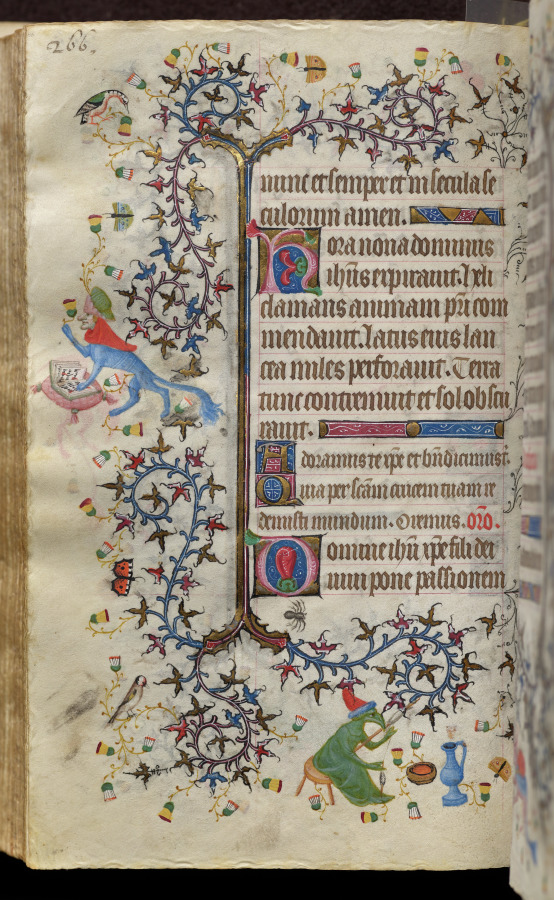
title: Hours of Charles the Noble, King of Navarre (1361-1425): fol. 133v, Text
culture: France, Paris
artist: Master of the Brussels Initials and Associates (French)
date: c. 1405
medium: ink, tempera, and gold on vellum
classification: Bound Volume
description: This precious volume was obviously highly prized by its owner, the French-born King of Navarre, who had his coat of arms painted on no less than twenty folios. Rather than directly commissioning this manuscript from a specific workshop, it seems that Charles the Noble acquired his book of hours -- perhaps ready-made for the luxury market -- while on a trip to Paris in 1404-05. A collaborative effort, six painting styles are evidenced within the pages of this codex, those of two Italians, two Frenchmen, and two Netherlanders. The painter who was responsible for the planning and decoration of the book, and who produced seventeen of the large miniatures, was a Bolognese artist known as the Master of the Brussels Initials. His principal assistant, responsible for most of the borders, was a Florentine who signed his name "Zecho" da Firenze on folio 208 verso.